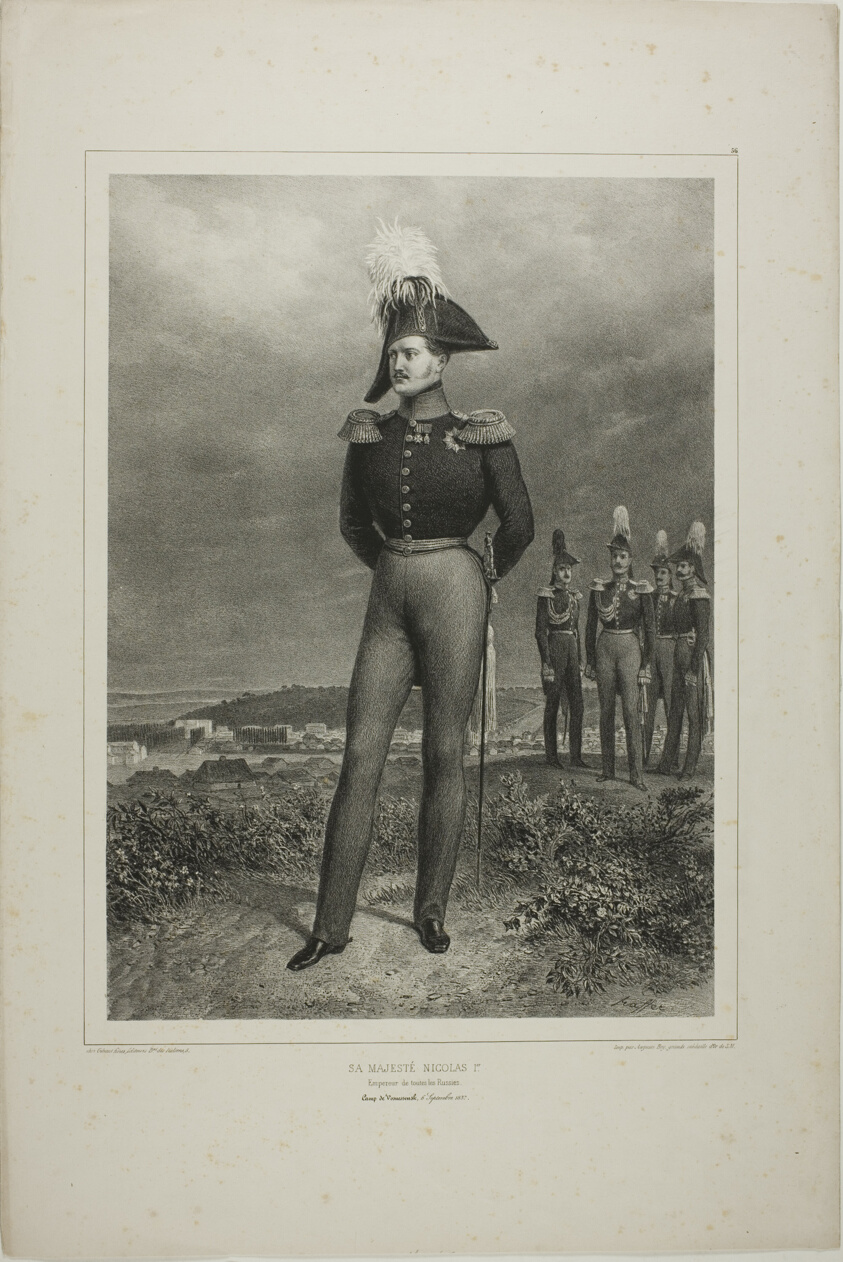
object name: Print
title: His Majesty Nicolas I, Emperor of all Russia, Camp Vosnessensk, October 6, 1837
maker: Denis Auguste Marie Raffet (French, 1804-1860); printed by Auguste Bry (French, 19th century); published by Chez Gihaut Frères (French, 19th century)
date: 1842–45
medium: Lithograph in black on ivory wove paper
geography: France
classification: lithograph; print; prints and drawing